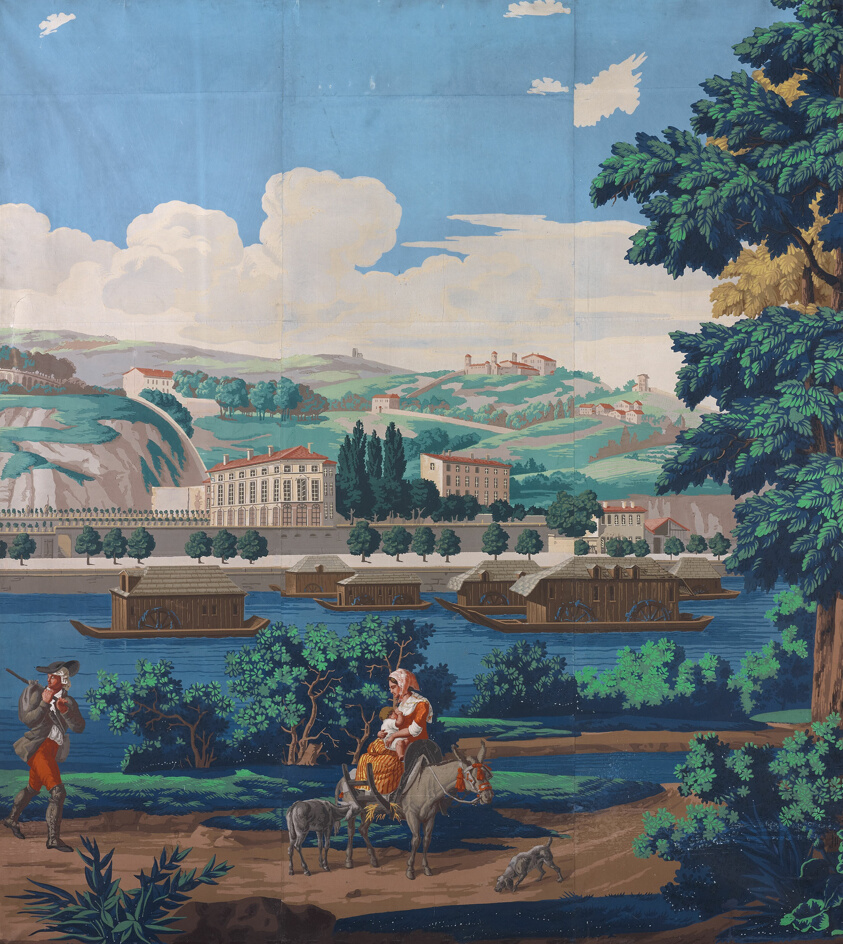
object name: Coverings and Hangings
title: Three Joined Panels: The Views of Lyon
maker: France, Paris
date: First edition, 1821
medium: Block-printed, color on paper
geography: France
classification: wallpaper; paper; european decorative arts